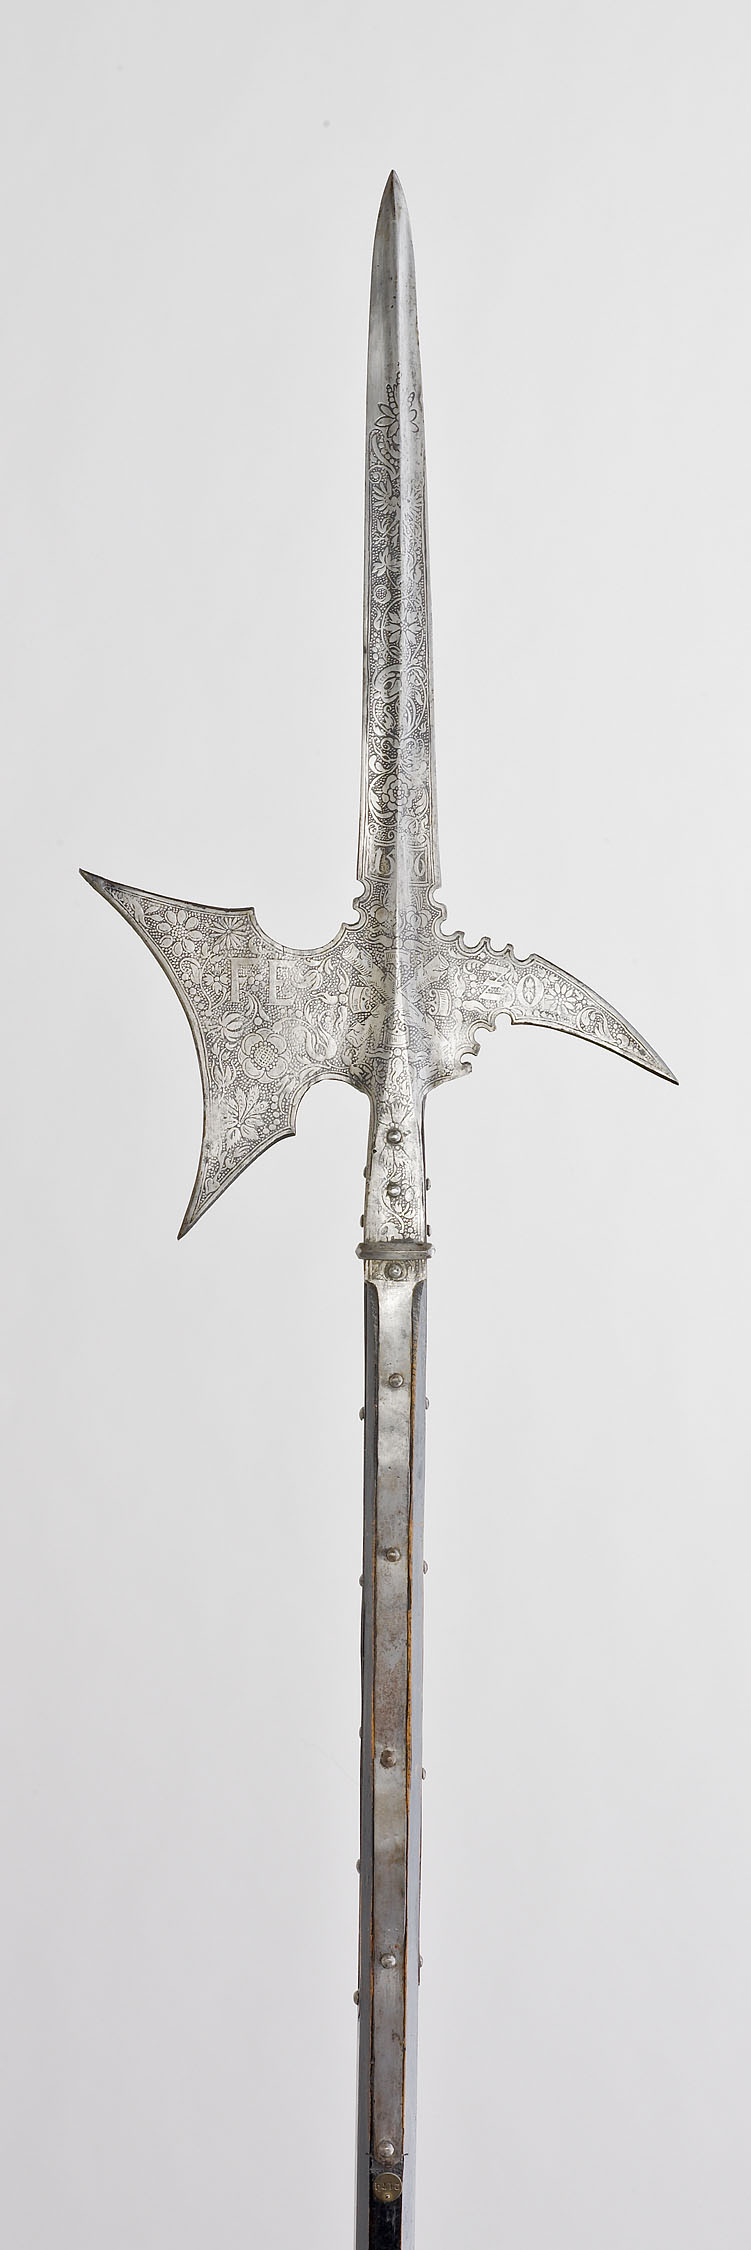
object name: Arms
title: Halberd for the Bodyguard of Archduke of Inner Austria (Later Emperor) Ferdinand II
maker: Austrian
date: 1596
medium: Steel, iron, and wood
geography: Austria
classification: edged weapon-staff; arms; arms and armor